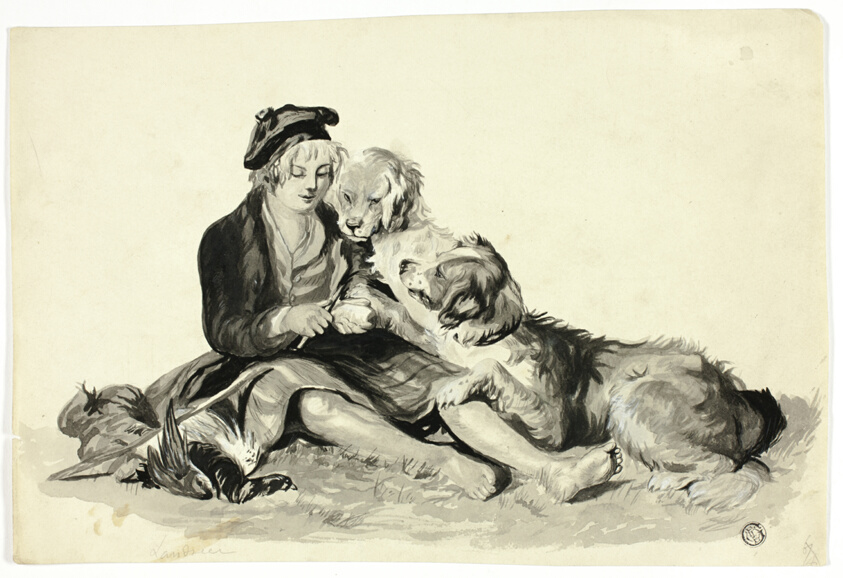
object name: Drawing and Watercolor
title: Highland Boy and Dogs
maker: Style of John Frederick Herring, I (English, 1795-1865); or Edwin Henry Landseer (English, 1802-1873)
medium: Brush and black gouache, with brush and gray wash, heightened with white gouache, over graphite, on cream wove paper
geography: England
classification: ink or chalk wash; drawings (visual works); prints and drawing